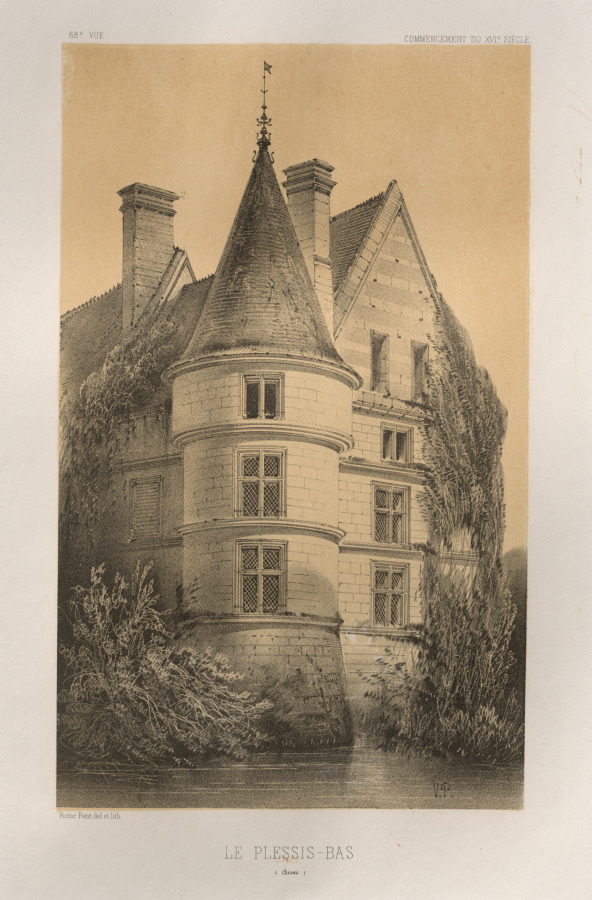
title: Architecture Pittoresque ou Monuments des XVeme. Et XVIeme. Siecles: Chateaux de France des XV et XVI Siecles: Pl. 68, Le Plessis-Bas (Aisne)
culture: France, 19th century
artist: Victor Petit (French, 1817–1874)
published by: Charles Boivin (publisher and editor); Lith de Godard a Paris (printer)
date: 1860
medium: lithograph with tint stone, from portfolio of 100 lithographs with tint stone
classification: Print